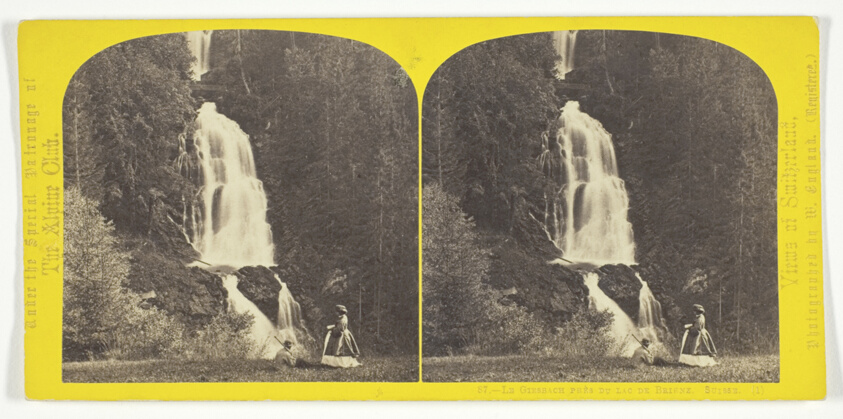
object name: Photograph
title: La Giesbach Pres du Lac de Brienz. Suisse, from the series "Views of Switzerland"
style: 19th century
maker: William England (English, 1816-1896)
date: 1850/65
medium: Albumen print, stereo, No. 57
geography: Switzerland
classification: photography; photograph; albumen silver print; stereograph (albumen)